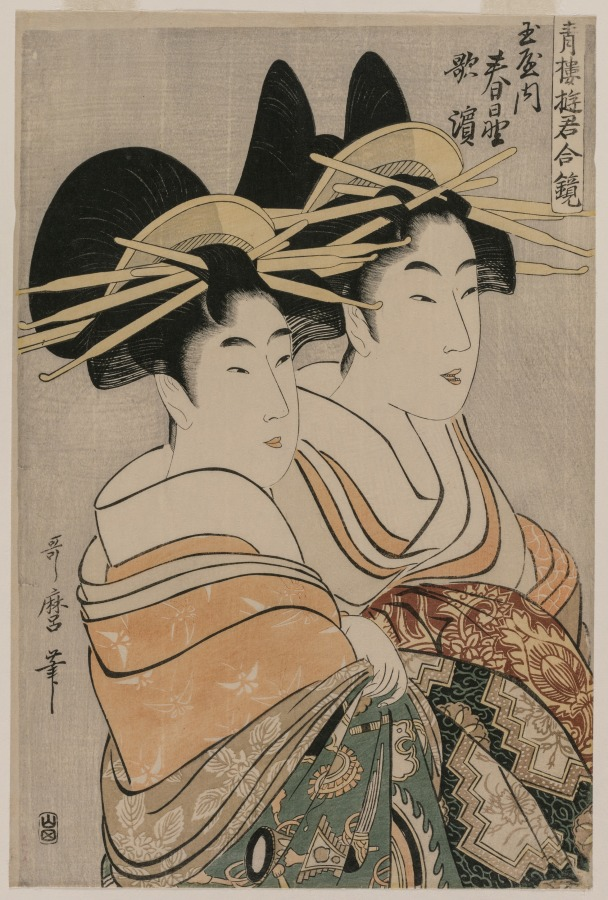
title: The Courtesans Kasugano and Utahama of Tamaya, from Courtesans of the Pleasure Quarters in Double Mirrors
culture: Japan, Edo period (1615–1868)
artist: Kitagawa Utamaro (Japanese, c. 1754–1806)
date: c. 1800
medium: color woodblock print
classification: Print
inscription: Signature: Utamaro hitsu. Publisher: Yamada.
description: Kitagawa Utamaro was well known for his close-up portraits that belonged to a genre, or category, of images called bijinga (pictures of beautiful people). This print is from a series that invites comparisons of the attractiveness of different figures. It features two sex workers from an establishment in the Yoshiwara district of Edo (now Tokyo).